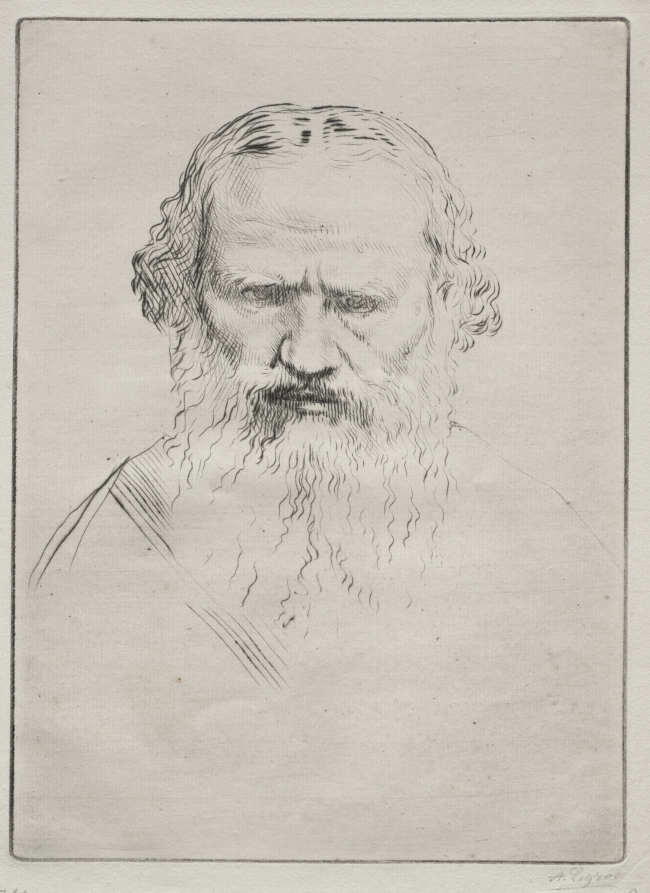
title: Tolstoi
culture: France, 19th-20th century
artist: Alphonse Legros (French, 1837–1911)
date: c. 1857–1911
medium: etching and drypoint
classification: Print